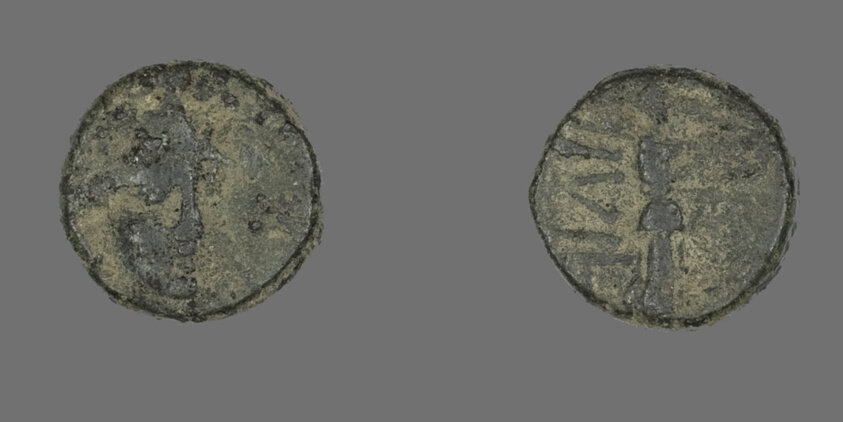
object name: Coin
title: Coin Depicting the Goddess Athena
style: greek, ancient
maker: Greek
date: 1st century BCE (?)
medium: Bronze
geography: Ancient Greece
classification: coin; ancient art